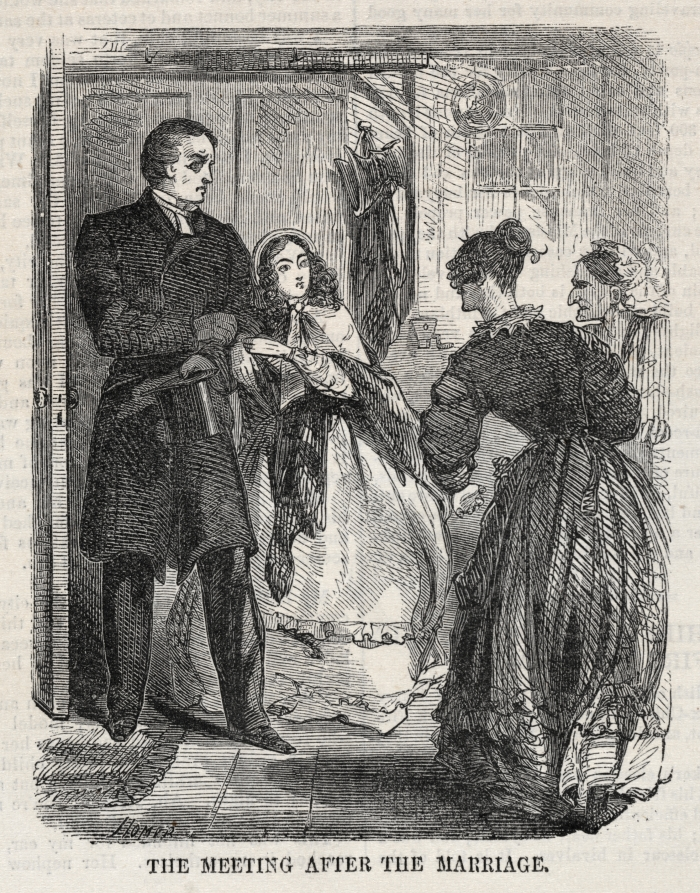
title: The Meeting After the Marriage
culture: America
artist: Winslow Homer (American, 1836–1910)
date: 1860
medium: wood engraving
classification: Print